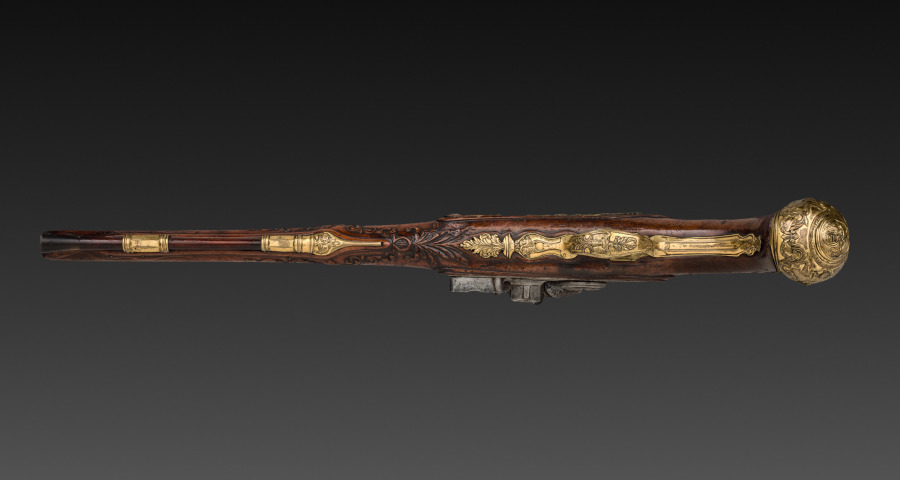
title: Flintlock Pistol (1 of 2)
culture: Franco-Flemish, Liège, early 18th century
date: early 1700s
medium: steel with gold inlay, gilt-brass mounts; walnut burl stock; chiseled high-relief decoration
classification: Arms and Armor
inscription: on barrel: G. MASSIN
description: The exquisite ornament along the breech of the barrel is chiseled and engraved. The barrel of this pistol is signed g. massin, the name of a gunsmith working in eastern France or French-speaking Flanders, possibly the city of Liège.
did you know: The flintlock ignition system was developed in the 1600s and remained the dominant system until the early 1800s.